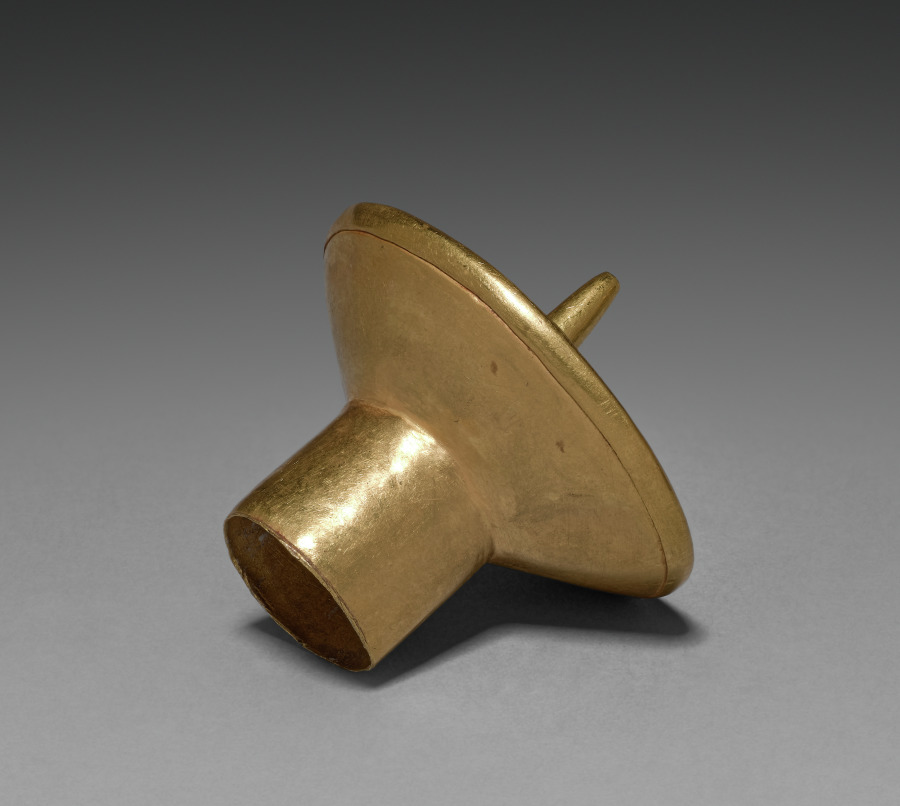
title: Ear Spool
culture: Panama, Conte style, 5th - 10th century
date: c. 400–900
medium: hammered gold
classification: Metalwork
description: Harvard archaeologists excavated this and seven other ornaments from several burials at Sitio Conte, a cemetery famous for its lavish graves of powerful chieftains. The young man buried in Grave 26 was such a chief. His status was stunningly memorialized by 21 human companions and 475 objects, many of them personal ornaments made of gold, including a large chest plaque and a rod-shaped ear ornament.